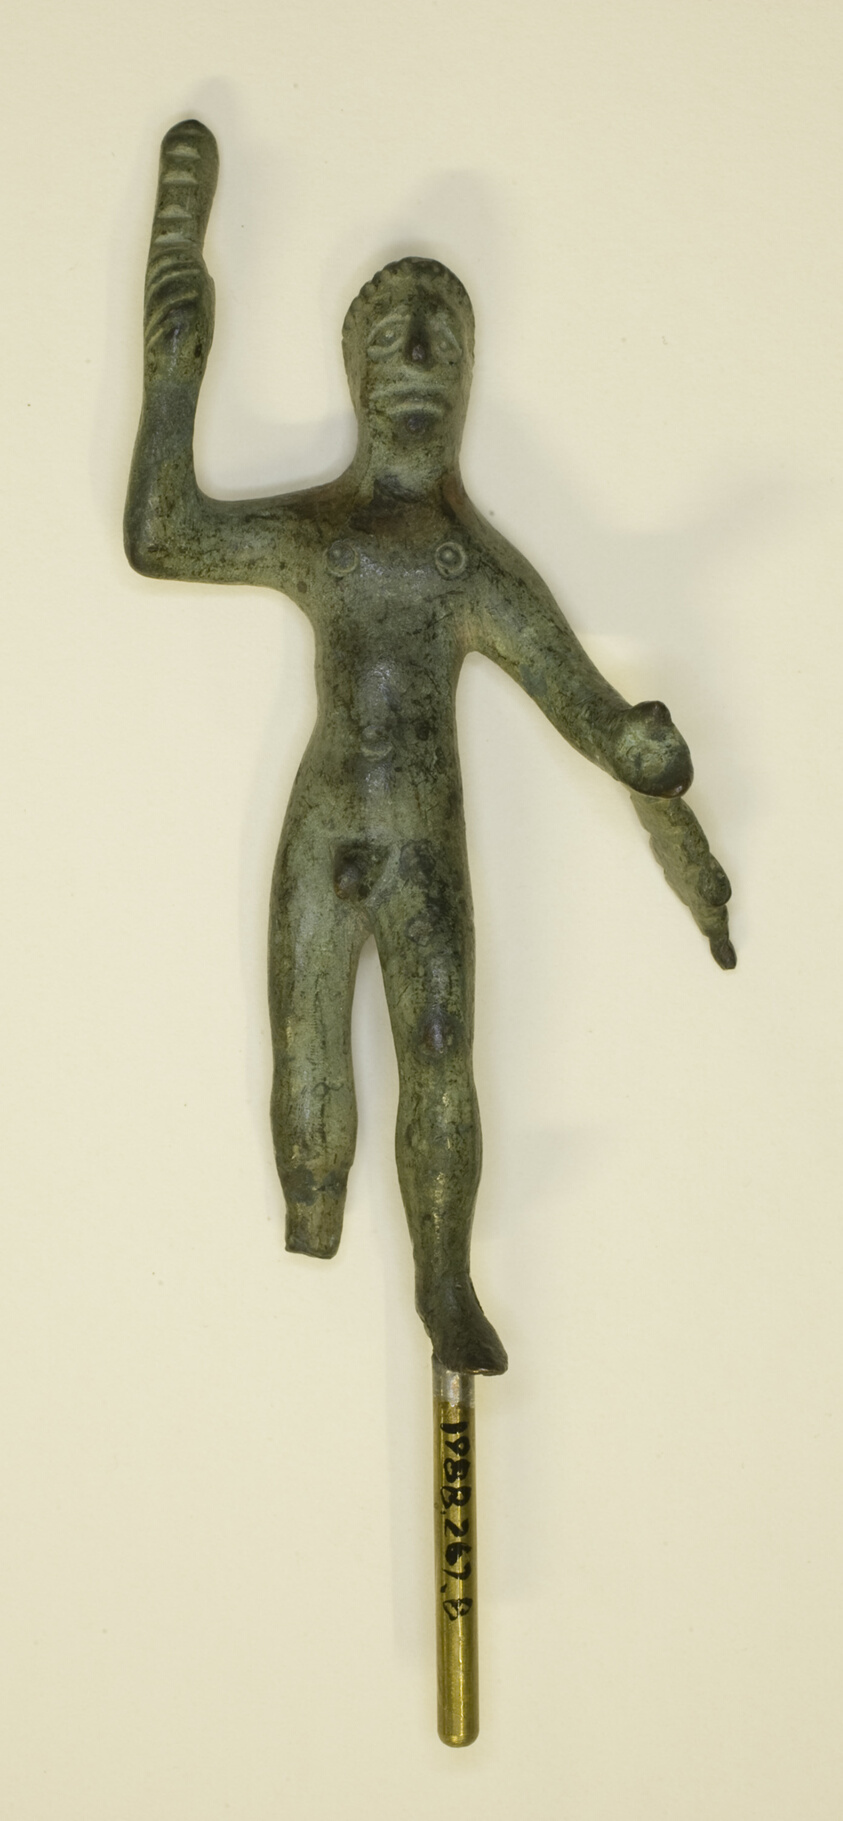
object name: Sculpture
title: Statuette of Herakles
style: etruscan, ancient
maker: Etruscan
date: 4th-3rd century BCE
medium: Bronze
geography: Etruria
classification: sculpture; ancient art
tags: Heracles